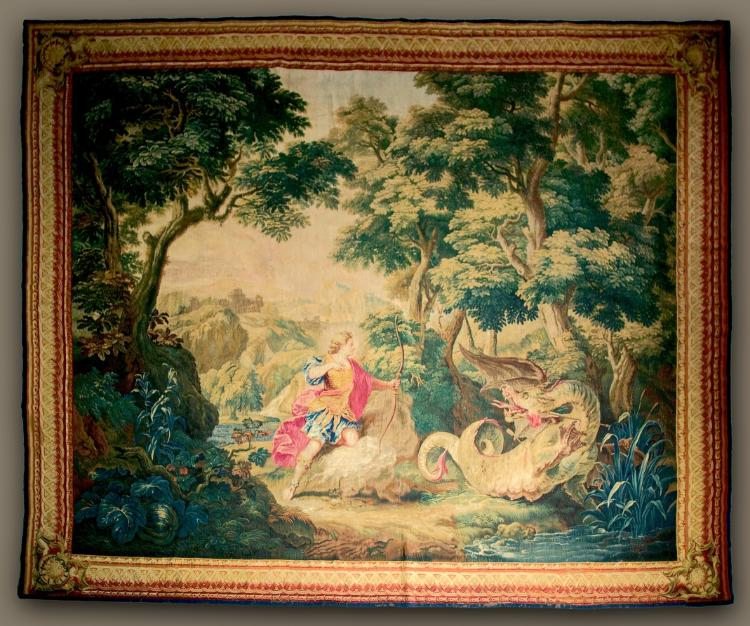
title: Apollo and the Serpent Python (from Set of Ovid's Metamorphoses)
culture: France, 18th century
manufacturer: Gobelins Manufactory (France, Paris, est. 1662)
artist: after Nicolas Bertin (French, 1668–1736)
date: 1700–1730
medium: tapestry weave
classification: Tapestry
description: Apollo’s dynamic posture with his right arm pulled back and his left holding a bow indicates that he has just shot the arrow piercing the snarling serpent’s throat and body. Apollo’s triumph over powerful Python, the fearsome serpent offspring of Mother Earth or Gaia, boosted his ego tremendously, leading to his tragically unsuccessful pursuit of Daphne. The regally dressed hunter and his prey are seen alone in an environment teeming with natural life that includes a pumpkin patch. In the creation of this textile, the manufacturer used blue and yellow dye to create the color green which has since degraded, causing the pumpkins and their leaves to appear blue.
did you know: During the French Revolution, Gobelins tapestries were sometimes disassembled to harvest the gold threads.